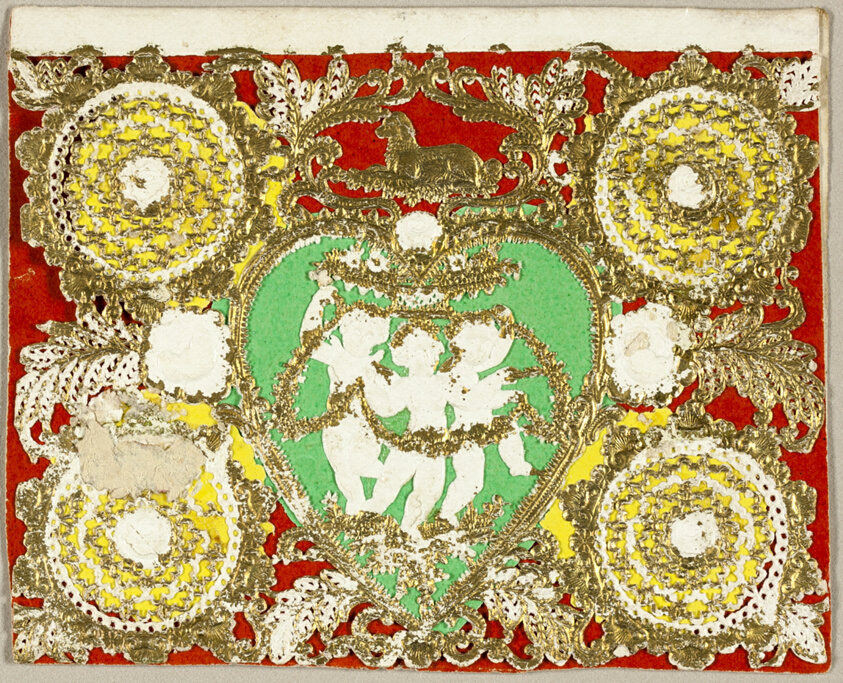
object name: Drawing and Watercolor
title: Untitled Valentine (Three Putti in Green Heart)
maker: Unknown Artist; American or English, 19th century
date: 1860/69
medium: Collaged elements and gold paint on cut and embossed (designed) ivory wove paper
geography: United States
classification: collage; valentine; prints and drawing; paper